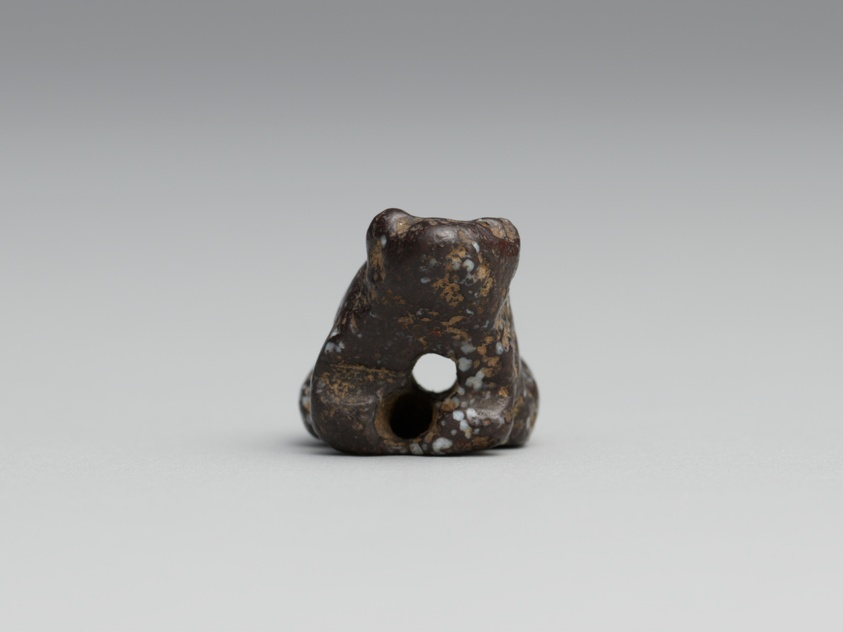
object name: Costume and Accessories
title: Amulet of a Frog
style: egyptian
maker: Egyptian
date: New Kingdom–Third Intermediate Period (about 1550–664 BCE)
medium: Stone (mottled brown white)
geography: Egypt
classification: amulet; jewelry; stone; ancient art; costume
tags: frog